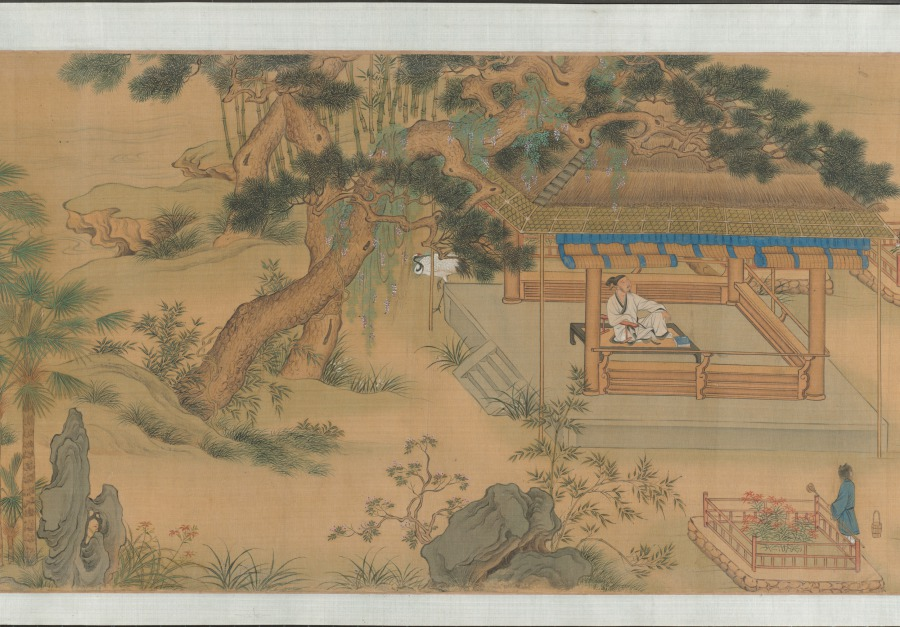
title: Garden for Solitary Enjoyment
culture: China, Ming dynasty (1368–1644)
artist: Qiu Ying (Chinese, 1494–1552)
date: 1515–52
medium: Handscroll; ink and light color on silk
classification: Painting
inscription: Accompanying text of an essay together with seven poems of Sima Guang (1019–1086) and one poem of Su Shi (1037–1101) written by Wen Zhengming (1470–1559) in 1558.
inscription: 2 colophons and 82 seals: 4 seals of Wen Zhengming 文徵明 (1470–1559); 59 seals of Xiang Yuanbian 項元汴 (1525–1590); 1 colophon, dated 1644, and 7 seals of Xiang Yukui 項禹揆 (c. late 1500s–1659); 1 colophon, dated 1880, and 2 seals of Weng Tonghe 翁同龢 (1830–1904); 2 seals of Ch'eng Chen-i (19th c.); 1 seal of Han Ch'ung (19th c.); 4 seals of Wan-go H. C. Weng 翁萬戈 (1918–2020); 3 seals unidentified.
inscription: Colophon by Xiang Yukui 項禹揆 (c. late 1500s–1659): The painting of The Garden for Self-enjoyment on the right by Shih-chou, Mr. Qiu [Qiu Ying] is in the style of Li Lung-mien. Its mood is peaceful, as if meeting the ancient gentlemen face to face among the brushes and silk; it lifts one above the sordid bustle of life. Formerly, my late father handed me this scroll which had only the painting without the written essay. I considered asking a good calligrapher to write the essay to add to it but was afraid that the quality of the writing would not match the painting. Several years later, I saw at a friend's house this essay and poems (of Ssu-ma Kuang] written by Hengshan [Wen Zhengming], once owned by my grandfather; so I spared no expense to obtain it. I rejoiced at this and said: "The divine swords are finally united. How things are pre-destined!" Now my friend Chang Kung-chao's technique for mounting [painting and calligraphy] is excellent. Therefore by daring to take them out and join them together, I can preserve this beautiful story of singular reunion. Xiang Yukui recorded at Hai-yeh-t'ang [hall] two days before New Year's Eve in the jiasheng year of the Chongzhen era [1644]. trans. LYSL/HK/WKH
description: Garden of Solitary Enjoyment refers to a site built in 1073 by the statesman Sima Guang (1019–1086) after he had retired to Luoyang, Henan province. Every spring, visitors would flock to his garden. Each of its seven structures references a historic figure. Sima wrote: I channel streams [like Du Mu], to water flowers [like Bai Juyi], or trim bamboo [like Wang Huizhi]. . . . I know of no joy between heaven and earth that could take its place. Qiu Ying’s painting, created after an 11th-century version of the same theme, must have appealed to garden owners of the Ming dynasty, since it became the template for numerous Suzhou workshop copies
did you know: Sima Guang completed his monumental survey of Chinese history, Zizhi tongjian, in the garden depicted in this painting.